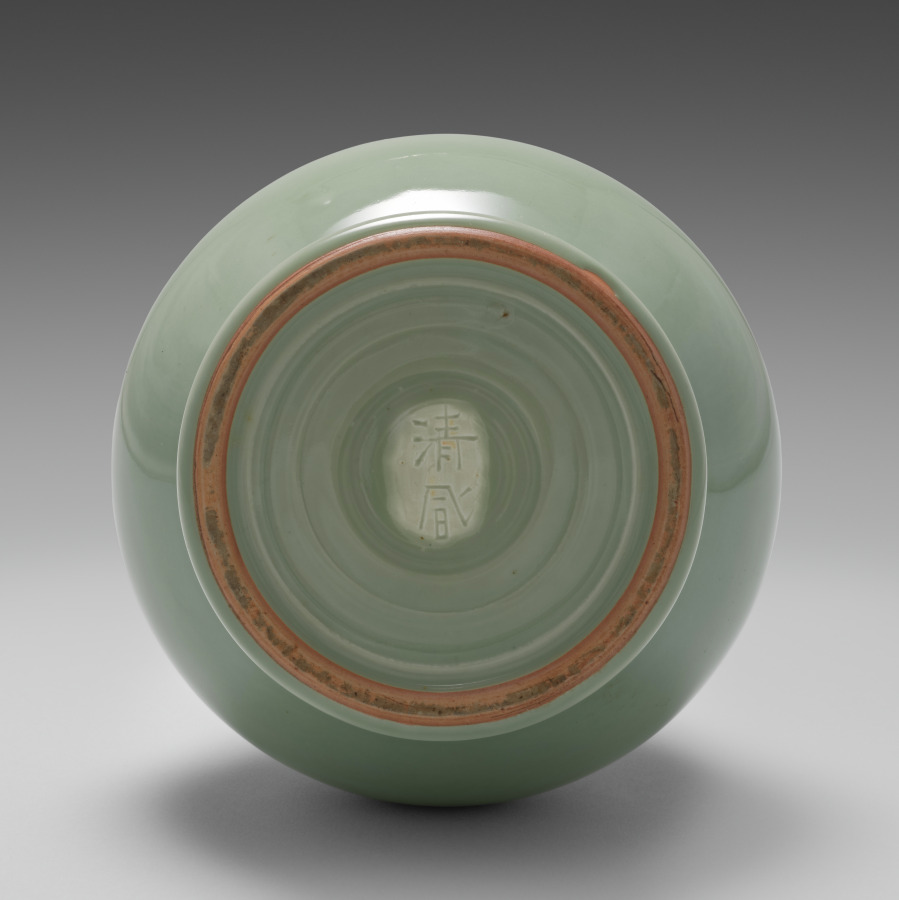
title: Flower Vase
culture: Japan, Meiji period (1868–1912)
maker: Seifū Yohei III (Japanese, 1851–1914)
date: 1912–14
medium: Porecelain with green glaze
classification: Ceramic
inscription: The vase's box lid identifies the vase as hisokuyō (C. mise yao 秘色窯), or “mysterious color ware,” style.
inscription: 清風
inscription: 清風制之 【印】帝室技芸員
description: This flower vase has a tall, slightly flared foot and bulbous body with a slimmer neck. It is completely undecorated but for the hisoku, or “mysterious color,” glaze. Its box lid has a red seal with a flower on it, a rather unusual feature also seen on the box for the green-glazed water container that belonged to the Hosokawa family (see CMA 2022.197).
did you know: The vase's box lid identifies the glaze as hisoku 秘色 or “mysterious color.”